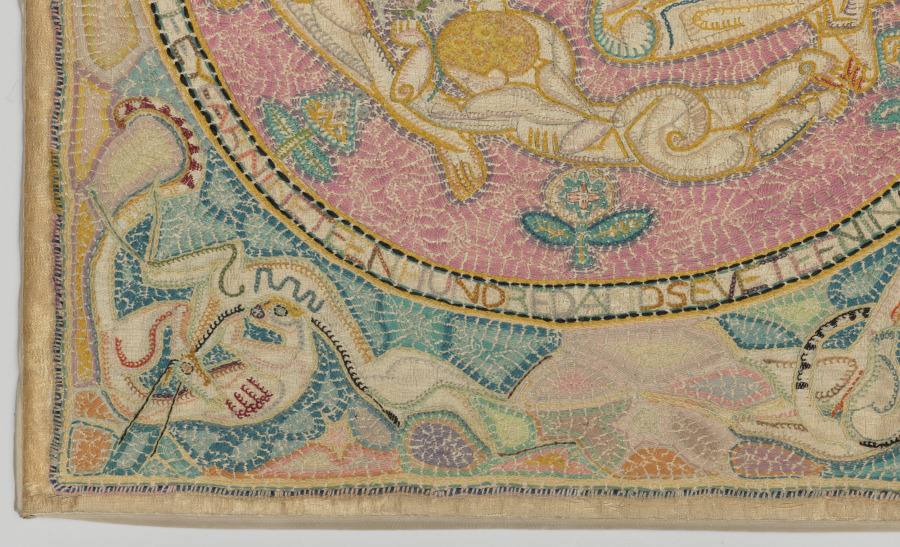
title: The Family (In Memory of a Summer in the White Mountains)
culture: America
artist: Marguerite Zorach (American, 1887–1968)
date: 1917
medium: plain weave silk; wool embroidery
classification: Embroidery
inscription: THE FAMILY / DONE BY MARGUERITE ZORACH IN THE YEAR NINETEEN HUNDRED AND SEVENTEEN IN MEMORY OF A SUMMER IN THE WHITE MOUNTAINS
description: Marguerite Zorach conceived her large, complex embroideries as major artistic statements at a time when the medium was routinely considered “craft,” as opposed to “fine art.” In doing so, she helped to erase such distinctions. One of her most acclaimed works, this example celebrates humanity in harmony with nature, presenting the artist, her husband (a Cleveland-raised sculptor named William Zorach), and their son amid an evergreen tree and four pairs of animals. Very time consuming to create, Zorach’s embroideries are rare.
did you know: In 1925, Zorach served as first president of the New York Society of Women Artists, an organization still in existence.